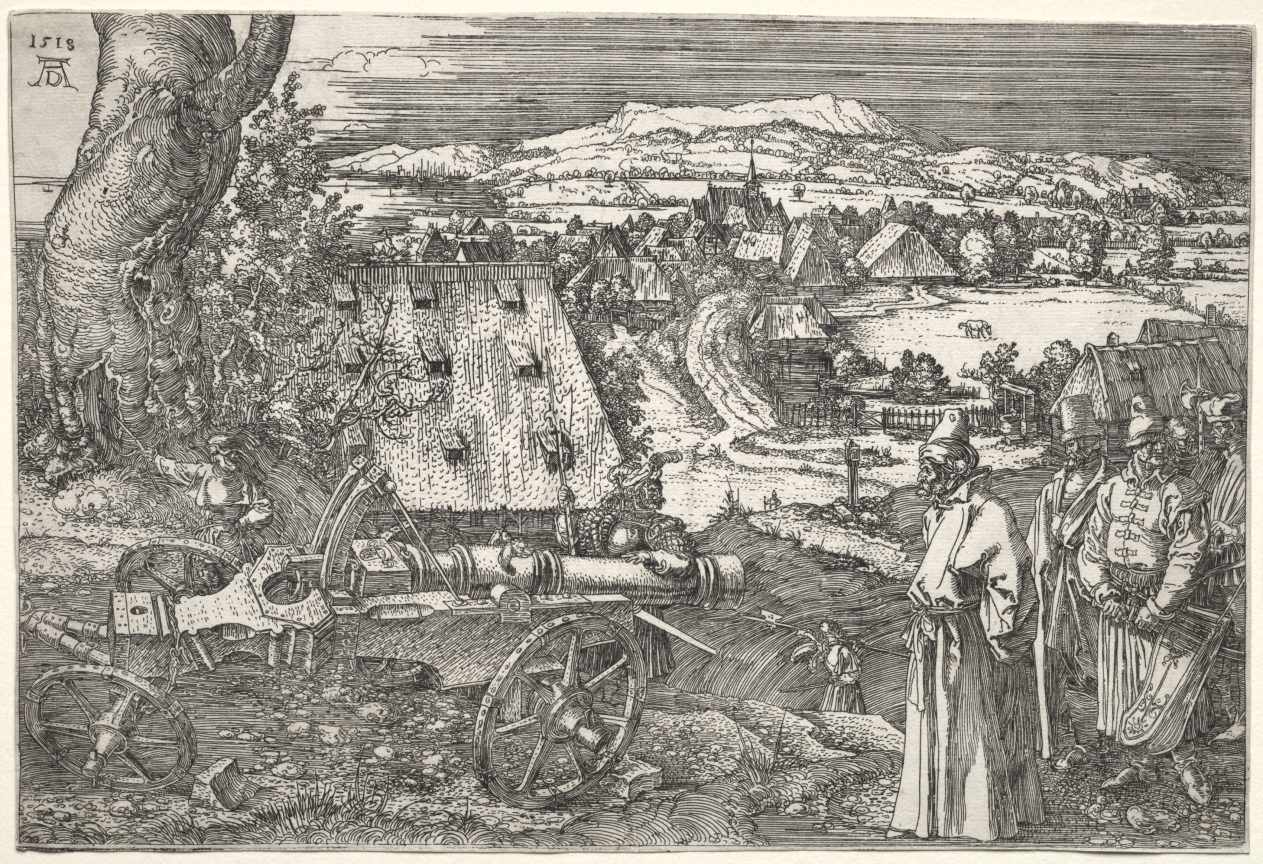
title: Landscape with the Cannon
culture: Germany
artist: Albrecht Dürer (German, 1471–1528)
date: 1518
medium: etching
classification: Print